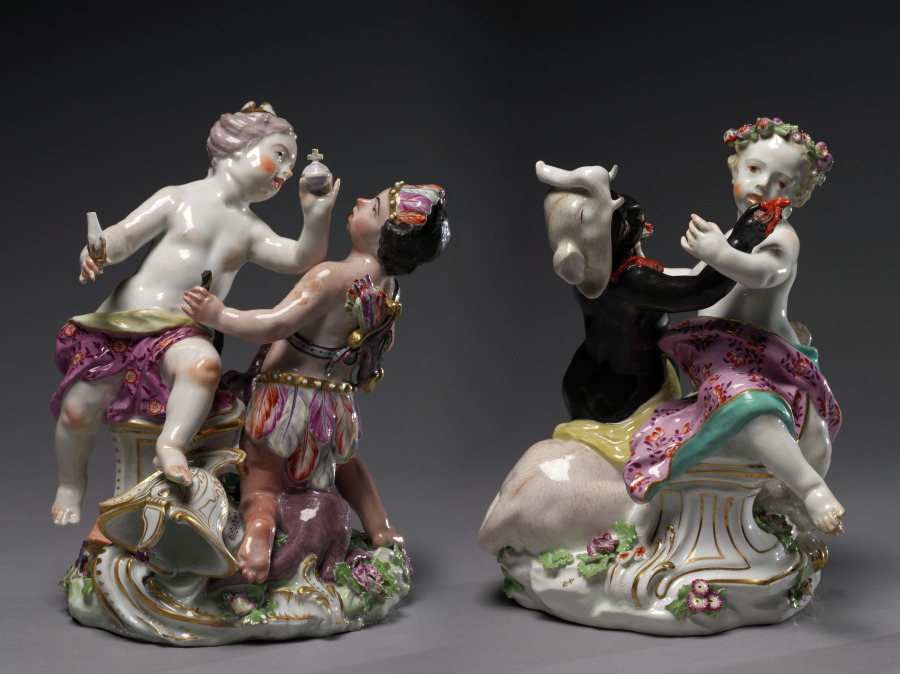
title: Pairs of Figures from the Four Continents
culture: England, Chelsea, mid-18th century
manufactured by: Chelsea Porcelain Factory (Britain, London, 1745–84)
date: c. 1760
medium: soft-paste porcelain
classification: Ceramic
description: Often collected by wealthy British merchants who were beneficiaries of colonial expansion, figural groups were frequently part of elaborate table decorations meant to signify wealth and global prominence. In one pair, Europe is seen holding an orb and wearing a crown as queen of the world, suggesting Europe’s supremacy over the other continents. She is entangled with America, who is wearing feathers with a bow and arrow at her feet. Africa, who wears an elephant headdress and holds a scorpion in one hand, wrestles with Asia, who is surrounded by perfumes and native fruits. Today we recognize these depictions of America, Africa, and Asia as racial stereotypes, revealing a purely imagined understanding of other cultures and continents at the time.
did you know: Figural representations of the four continents date back to the 1500s, but such imagery became even more popular in the 1700s as European empires expanded.